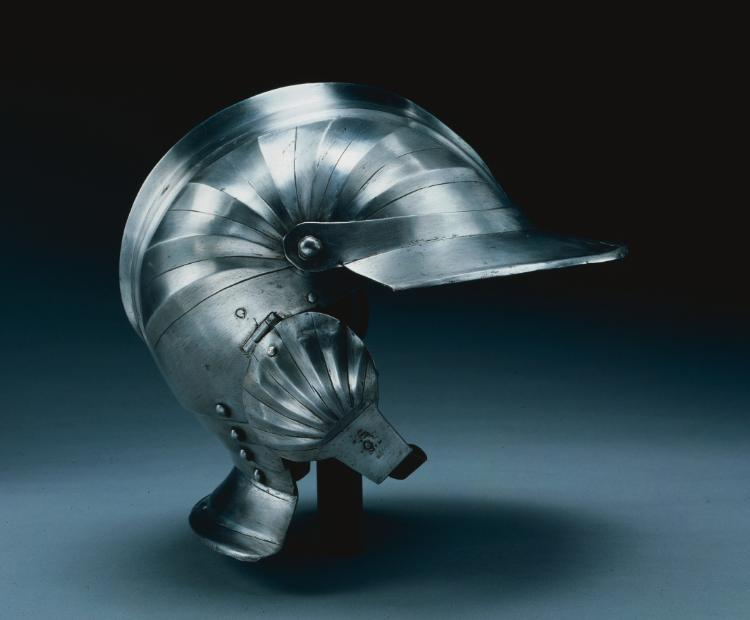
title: Burgonet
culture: Italy, Milan(?), 16th century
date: c. 1510–40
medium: steel, radiate flutings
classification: Arms and Armor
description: A burgonet is a light, open helmet characterized by a peak, a fall over the eyes, and hinged earpieces. Used by cavalry in the 1500s and 1600s, they were sometimes worn with a buffe, a separate detachable element that protected the face and throat not covered by the burgonet.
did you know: The burgonet helmet is the successor to the previously worn sallet which was much the same but without the hinged earpieces and extended peak over the eyes.